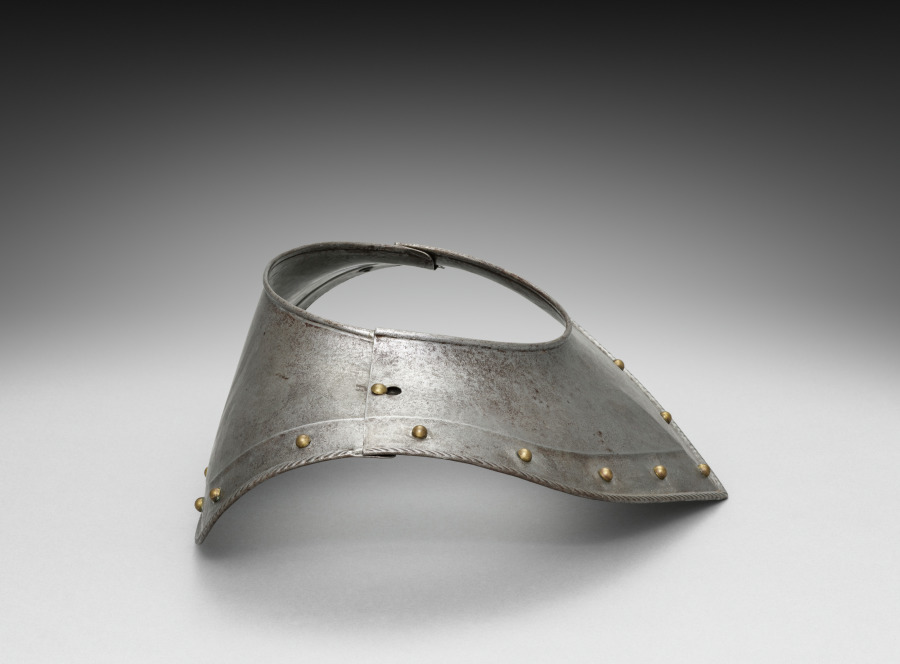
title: Colletin (two pieces)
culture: Germany, 19th century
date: 1801–1900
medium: steel with black paint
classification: Arms and Armor